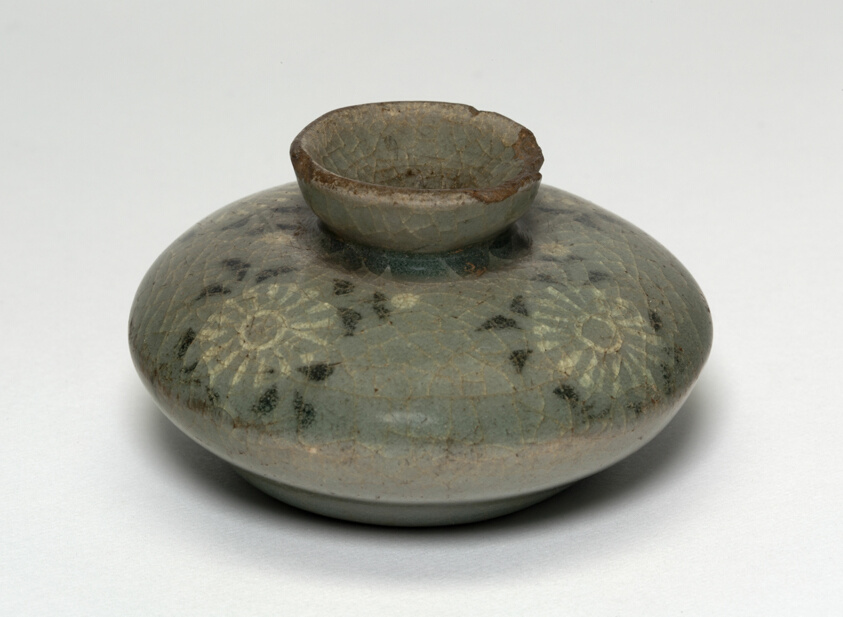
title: Oil Bottle with Chrysanthemum Flower Heads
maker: Korea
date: Goryeo dynasty (918–1392), late 12th/13th century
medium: Celadon-glazed stoneware with underglaze inlaid decoration of black and white clays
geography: Korea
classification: ceramics; asian art